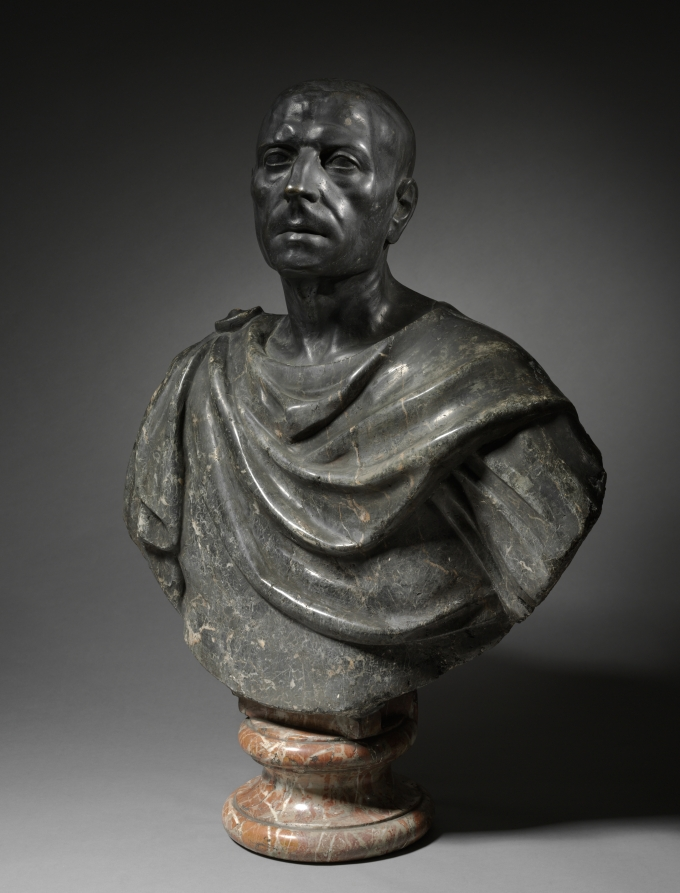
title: Bust of the Ludovisi Cicero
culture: Italy, 17th century or later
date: 1600s or later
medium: marble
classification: Sculpture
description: This work is a variant on the so-called Ludovisi Cicero, a bust in the Uffizi, Florence, that was long-believed to represent the famous Roman orator, but in fact appears to represent an unknown intellectual from the late Roman Republic or early Empire. This interpretation may date as late as the 20th century, and may have been assembled from separate parts.